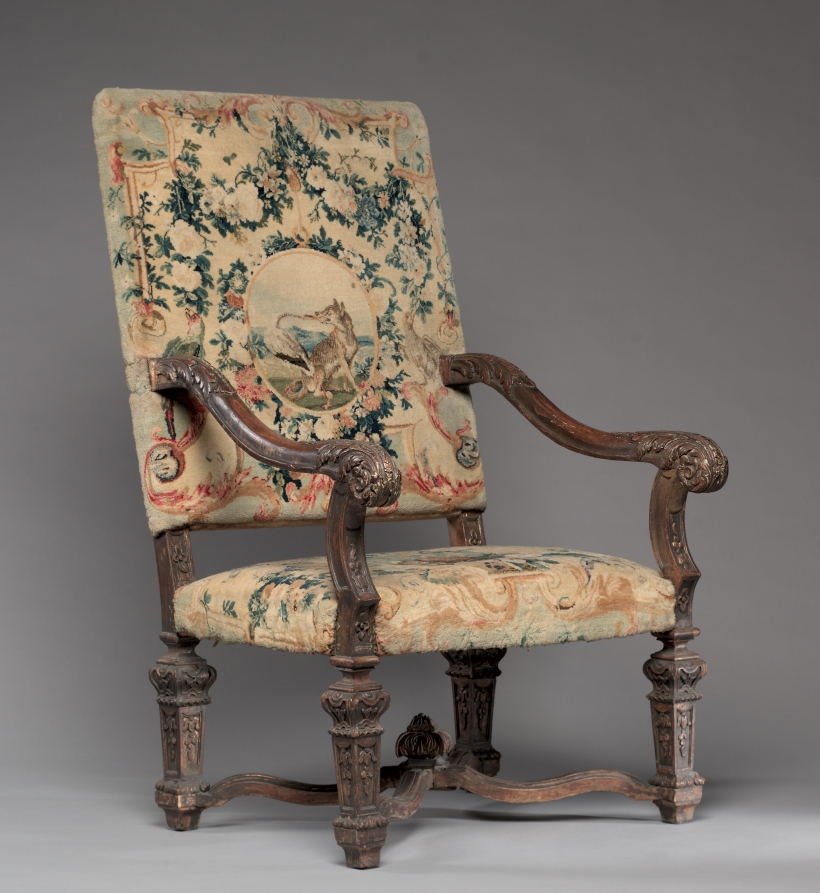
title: Armchair (1 of 4)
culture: France, 18th century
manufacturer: Royal Savonnerie Manufactory, Chaillot Workshops (French, est. 1627)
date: before 1717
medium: carved wood, Savonnerie knotted-pile (symmetrical rug knot) upholstery; wool, hemp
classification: Furniture and woodwork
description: These chairs belong to a suite that includes a settee (also in the CMA’s collection) and a tapestry made for a count and countess to mark their wedding in 1717. Furniture of this scale was usually placed against the wall in grand reception halls, more as a display of wealth than for use. Upholstered in Savonnerie tapestries, this suite was among the most treasured and expensive example anyone could own and typically reserved for royalty. To add decorative and intellectual interest to the textiles, weavers incorporated symbols depicting various stories from the Fables of Jean de La Fontaine, published from 1668 to 1694 and largely adapted from Aesop and other early storytellers.